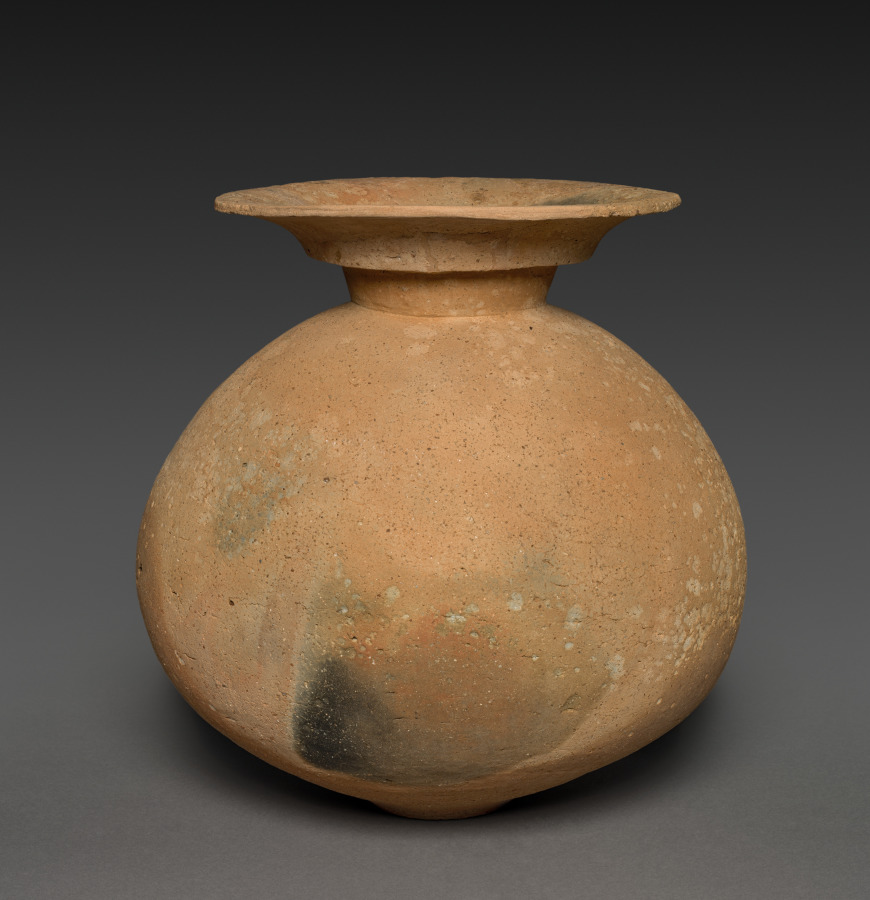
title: Vessel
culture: Japan, Yayoi period (c. 300 BCE–300 CE)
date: 300s BCE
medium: Earthenware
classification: Ceramic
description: Pottery existed for thousands of years in Japan before the Yayoi period, but the development of wet rice agriculture and permanent settlements by previously nomadic communities changed its form significantly. Yayoi period pots were aimed more at long-term storage than those from prior millennia. Their smooth, unadorned surfaces and round shapes also reflect the style of contemporaneous works from the Korean peninsula, indicating the strong ties between Japanese communities and Korean kingdoms at the time.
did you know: Yayoi ceramics, like this example, were likely made by laying one coil of clay on top of another to form the body of the vessel.